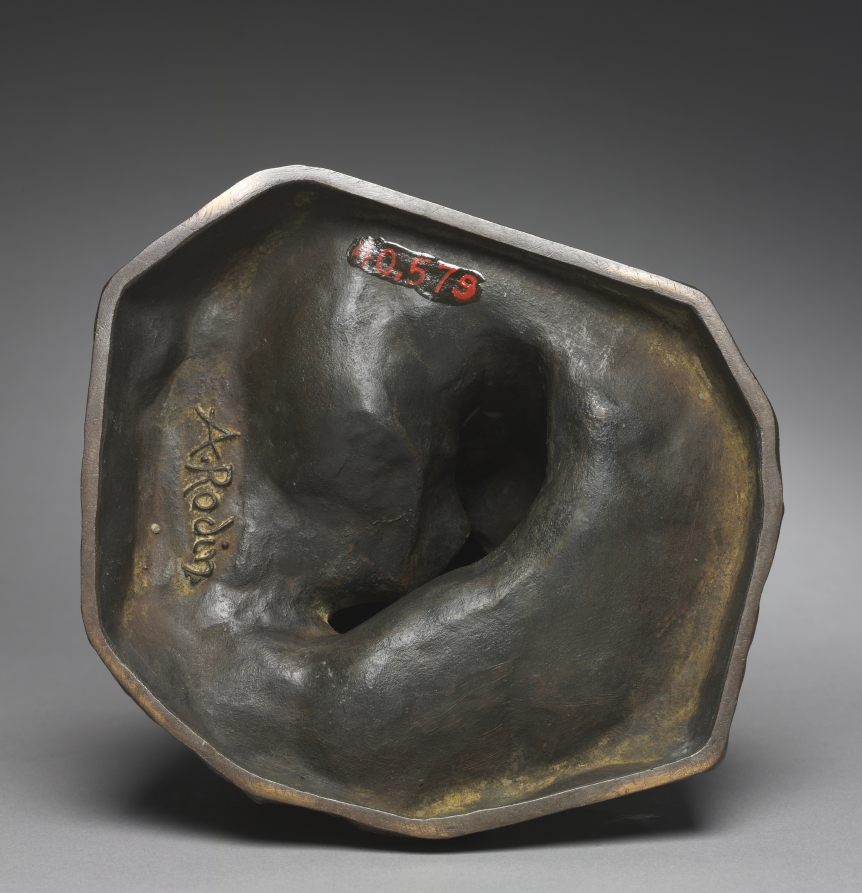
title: The Hand of God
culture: France, late 19th-early 20th Century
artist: Auguste Rodin (French, 1840–1917)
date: c. 1880 – 1917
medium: bronze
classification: Sculpture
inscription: Signed on back and in relief inside the lower base: "A. Rodin"